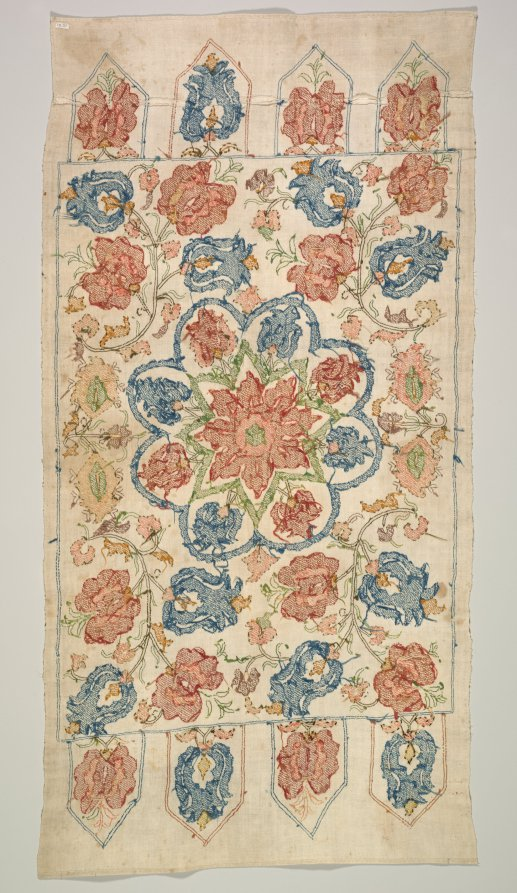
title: Embroidered cushion cover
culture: Turkey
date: 1700s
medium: plain weave: linen; embroidery, self-couching and herringbone stitches: silk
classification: Embroidery